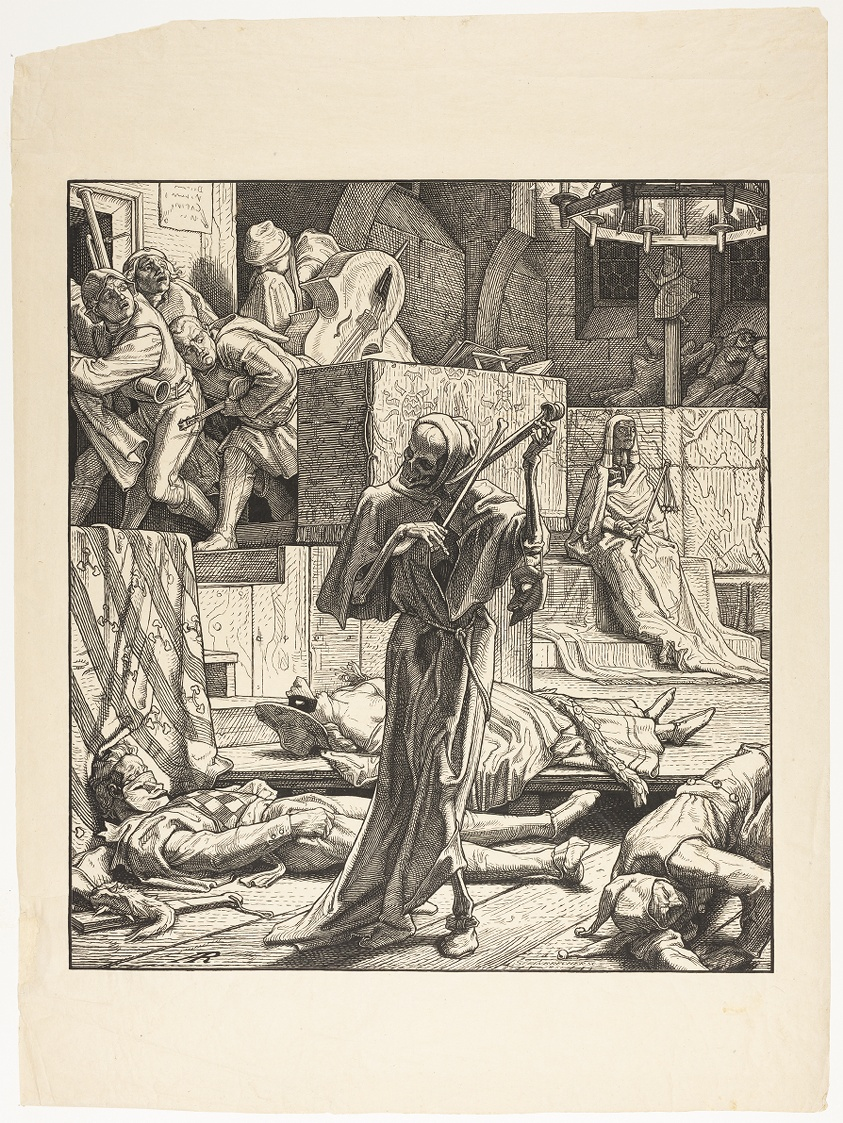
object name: Print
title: Death the Strangler, The First Outbreak of Cholera at a Masked Ball in Paris, 1831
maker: Alfred Rethel (German, 1816-1859)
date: 1851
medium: Woodcut on cream wove paper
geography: Germany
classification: woodcut; print; prints and drawing